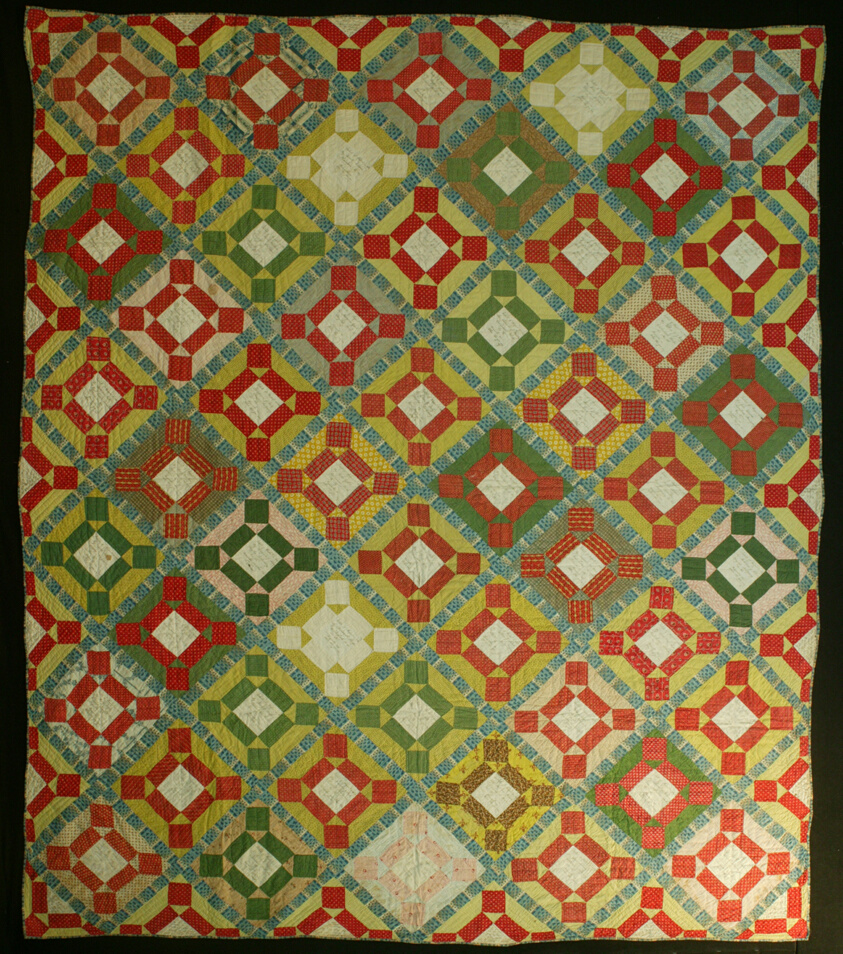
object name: Textile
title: Bedcover ("Album Patch" or "Signature" Quilt)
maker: United States, Pennsylvania, Berks, Lebanon and Montgomery County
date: 1847/48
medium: Cotton, various plain weaves; most printed; pieced; quilted; inscribed; backed with cotton, plain weave; pieced; printed; edged with cotton, plain weave; printed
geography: United States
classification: needlework - quilt; textile